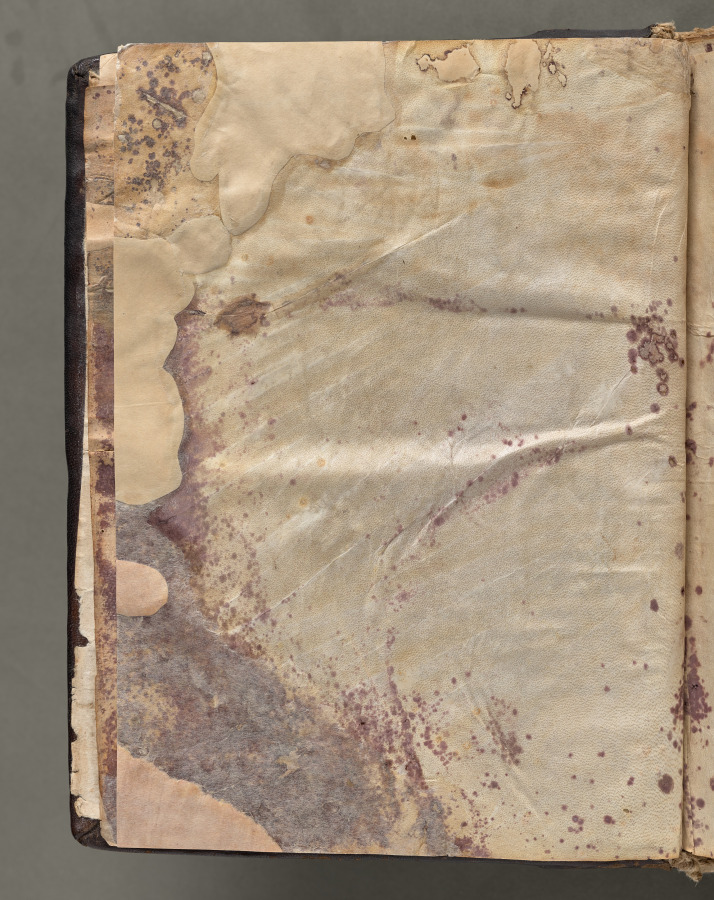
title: Text, folio 4 (verso), from a Gospel Book with Commentaries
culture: Byzantium, Constantinople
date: c. 1000–1100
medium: ink, tempera, and gold on vellum; leather binding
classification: Bound Volume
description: Each of the four gospels in this book opens on a page with brilliantly illuminated borders depicting the author of the text as well as birds-principally peacocks, symbols of the immortality of the soul-and fountains, representing the fountain of life and the salvation of the soul. This volume consists of 428 leaves with texts in Greek. Its level of sophistication suggests that it was probably written and decorated in a monastery in Constantinople.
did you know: Gospel Books were carried in procession through Byzantine churches.